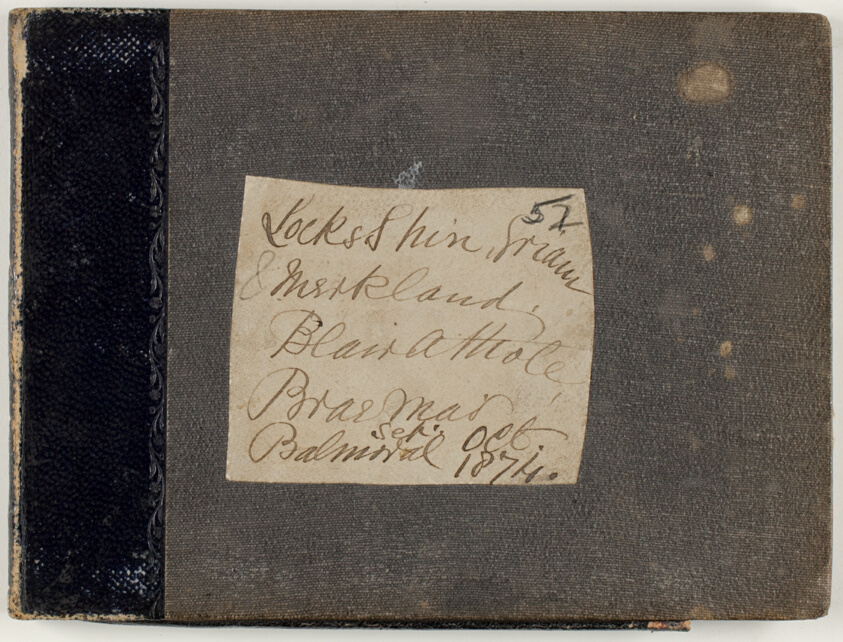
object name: Book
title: Loch Finn, etc.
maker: Charles George Lewis (English, 1808-1880)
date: 1874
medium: Sketchbook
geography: England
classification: sketchbook; graphite; prints and drawing; book